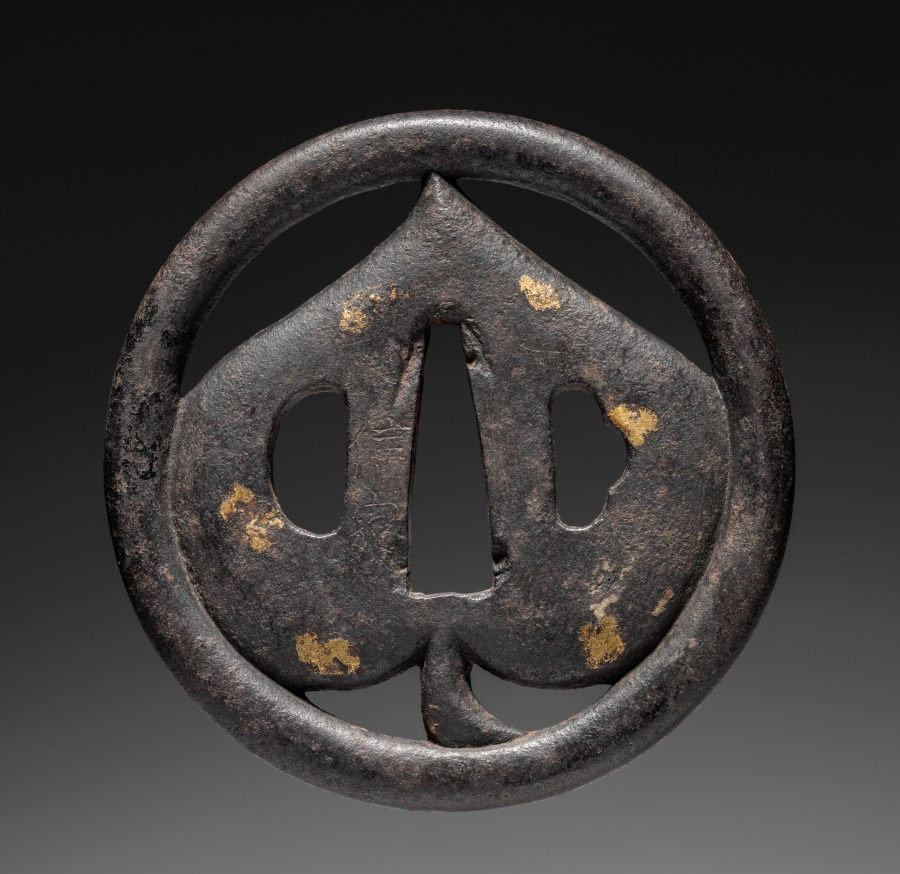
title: Sword Guard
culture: Japan, possibly Edo period (1615-1868)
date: c. 1615–1868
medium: iron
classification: Arms and Armor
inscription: signed: 信家